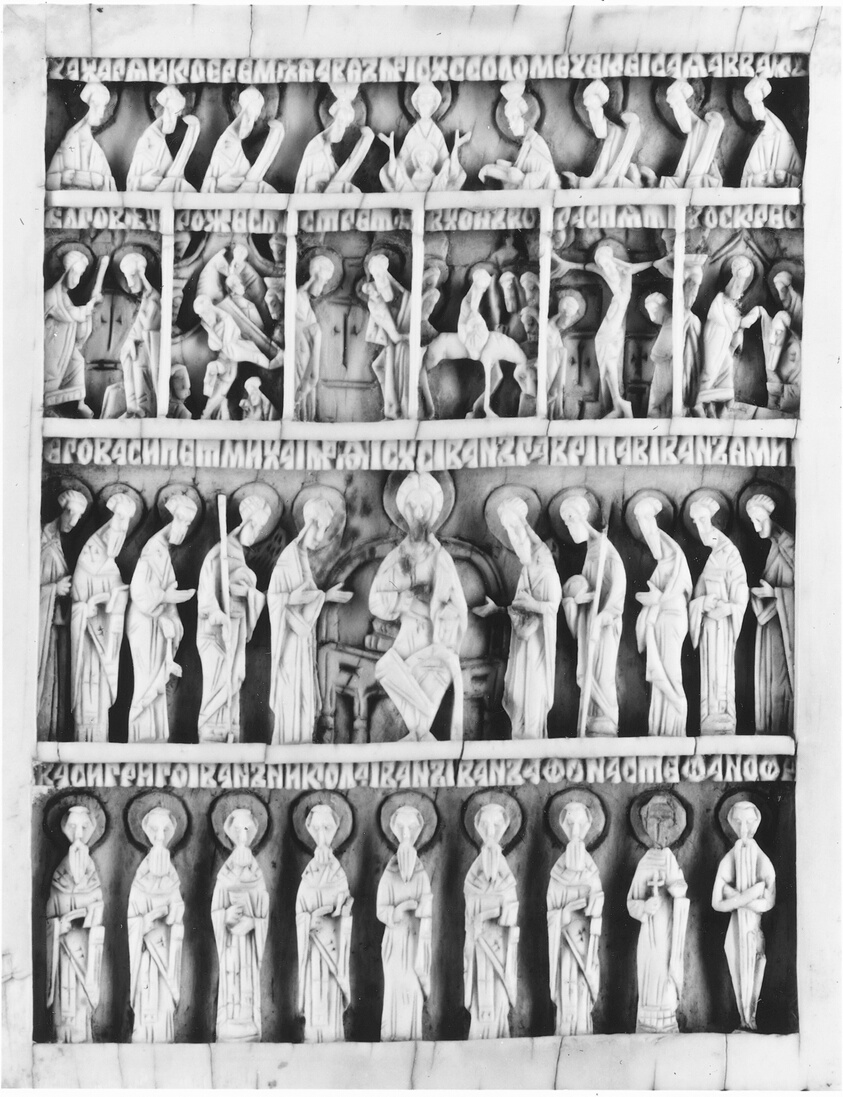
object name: Sculpture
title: Christ in Majesty surrounded by the Fathers of the Church with Scenes from the Life of Christ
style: 17th Century, 18th Century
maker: Russian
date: 17th/18th century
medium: Ivory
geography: Russia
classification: relief; sculpture; religious; ivory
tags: Christian subjects, animals, Christianity, crucifixions, Jesus, men, religion, religious, religious figures, religious scenes, saints